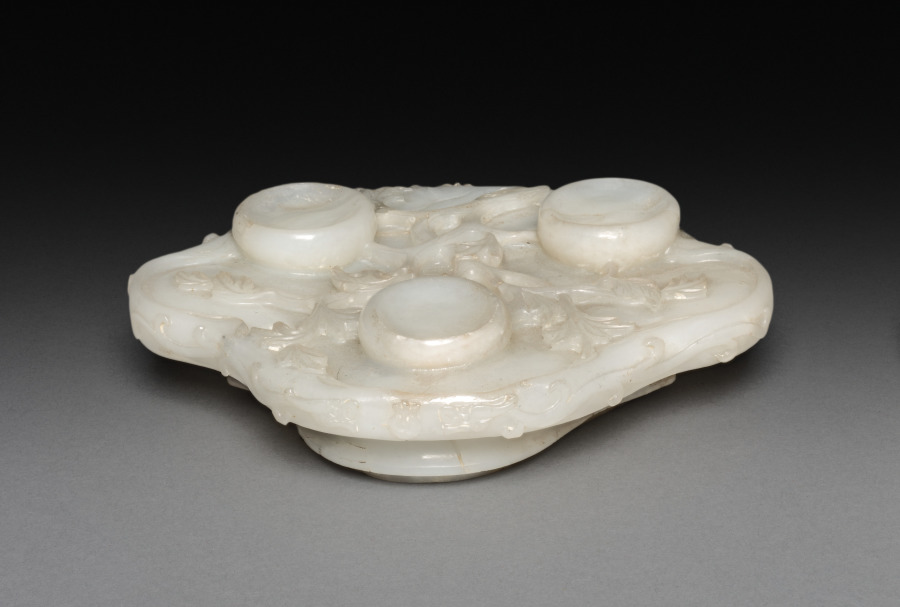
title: Three-Sectional Altar Group: Koro (upper section of base)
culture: China, Qing dynasty (1644-1911)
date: 1644–1911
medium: jade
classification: Jade